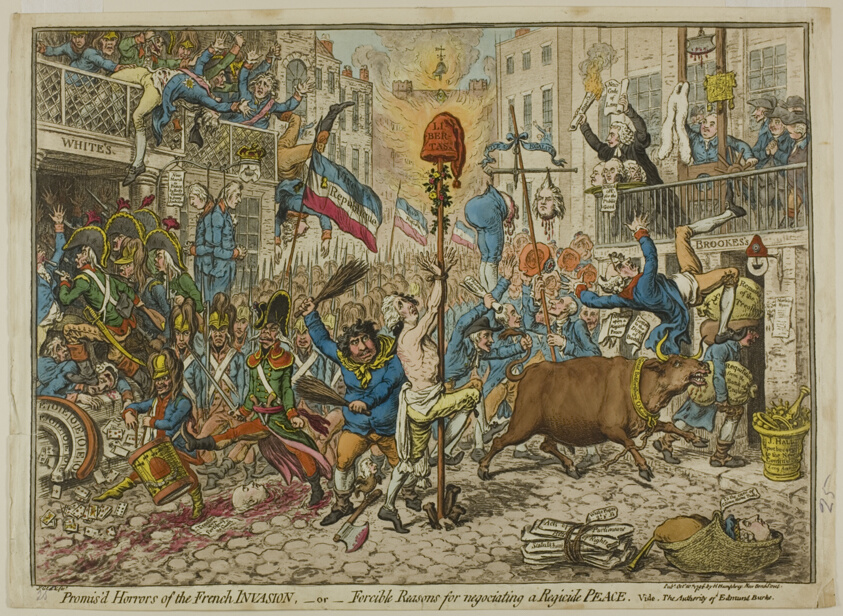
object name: Print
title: Promis'd Horrors of the French Invasion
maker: James Gillray (English, 1756-1815); published by Hannah Humphrey (English, c. 1745-1818)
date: published October 20, 1796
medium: Hand-colored etching on paper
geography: England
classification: etching; print; prints and drawing